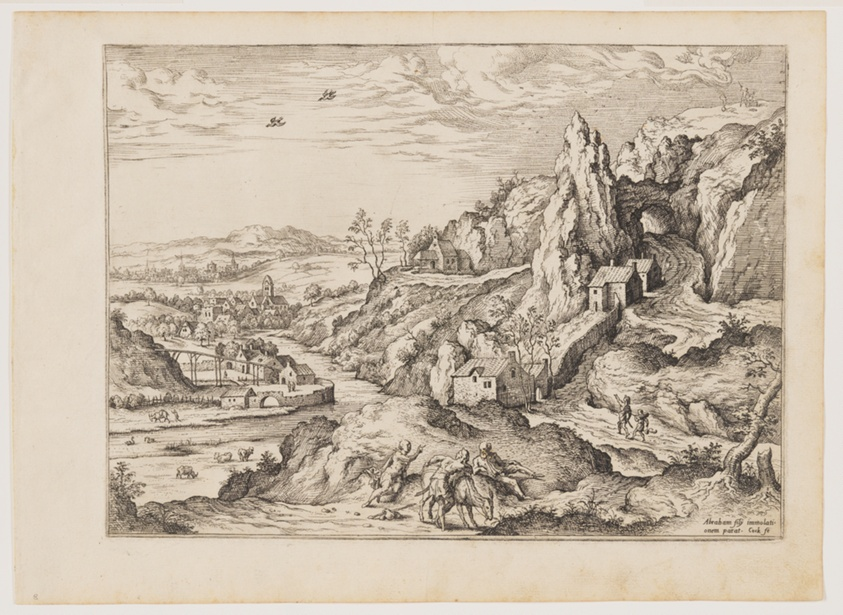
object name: Print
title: Abraham and Isaac on the Way to Sacrifice, from Landscapes with Biblical and Mythological Scenes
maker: Hieronymus Cock (Netherlandish, c. 1510–1570); after Matthys Cock (Netherlandish, c. 1505-1548)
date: 1558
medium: Etching on ivory laid paper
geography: Netherlands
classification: etching; paper; print; prints and drawing